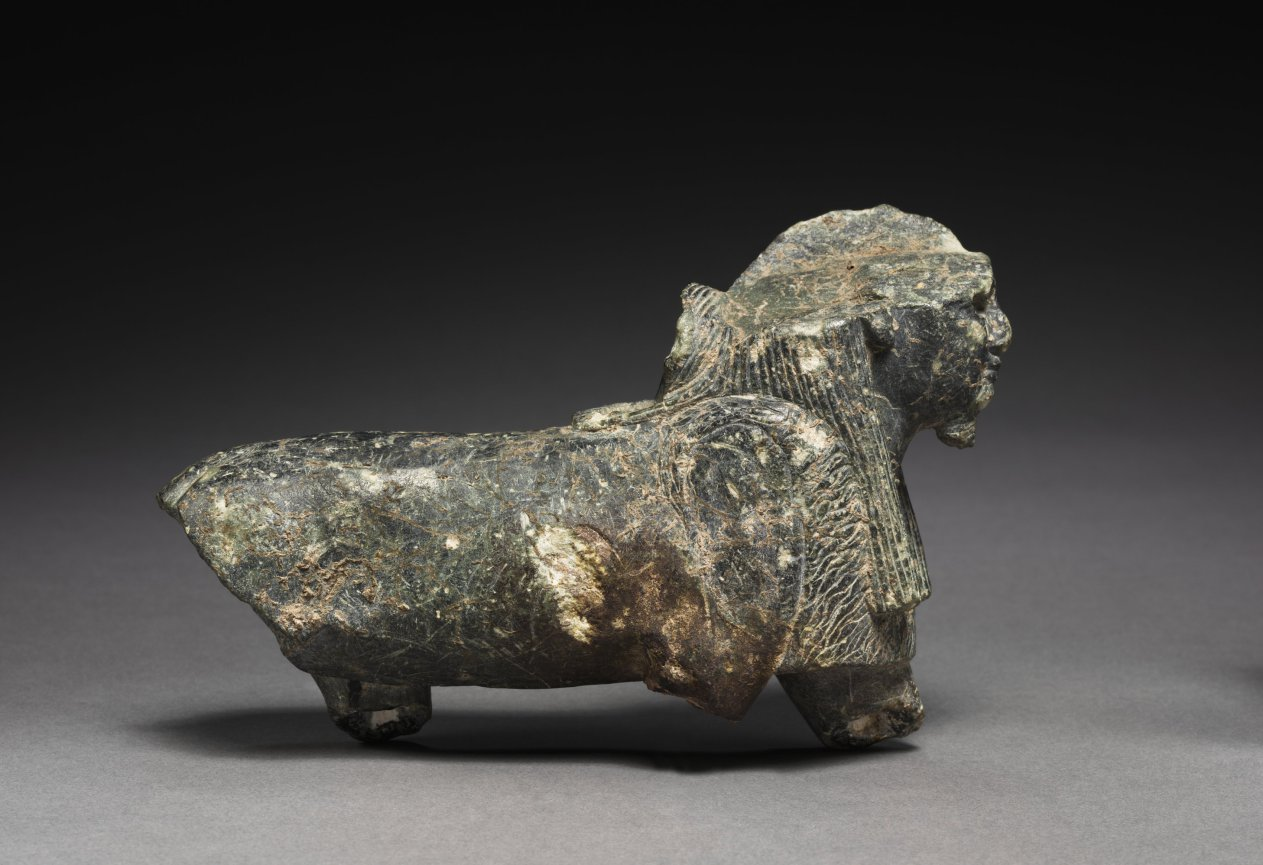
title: Tutu as Sphinx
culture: Egypt, Greco-Roman period (332 BCE–395 CE), Ptolemaic dynasty (305–30 BCE)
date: 150 BCE–30 CE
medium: gray steatite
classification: Sculpture